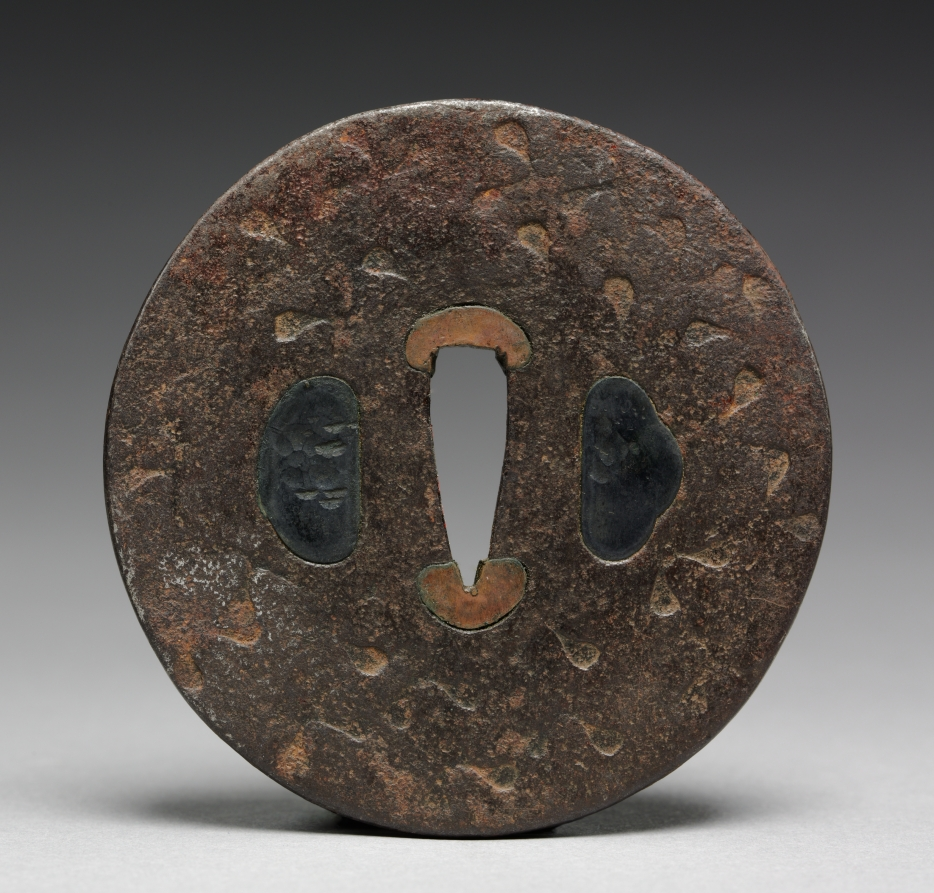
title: Sword Guard (Tsuba)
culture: Japan, Muromachi period (1392–1573)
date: 1500–1573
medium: iron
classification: Arms and Armor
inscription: Signature: Nobuiye